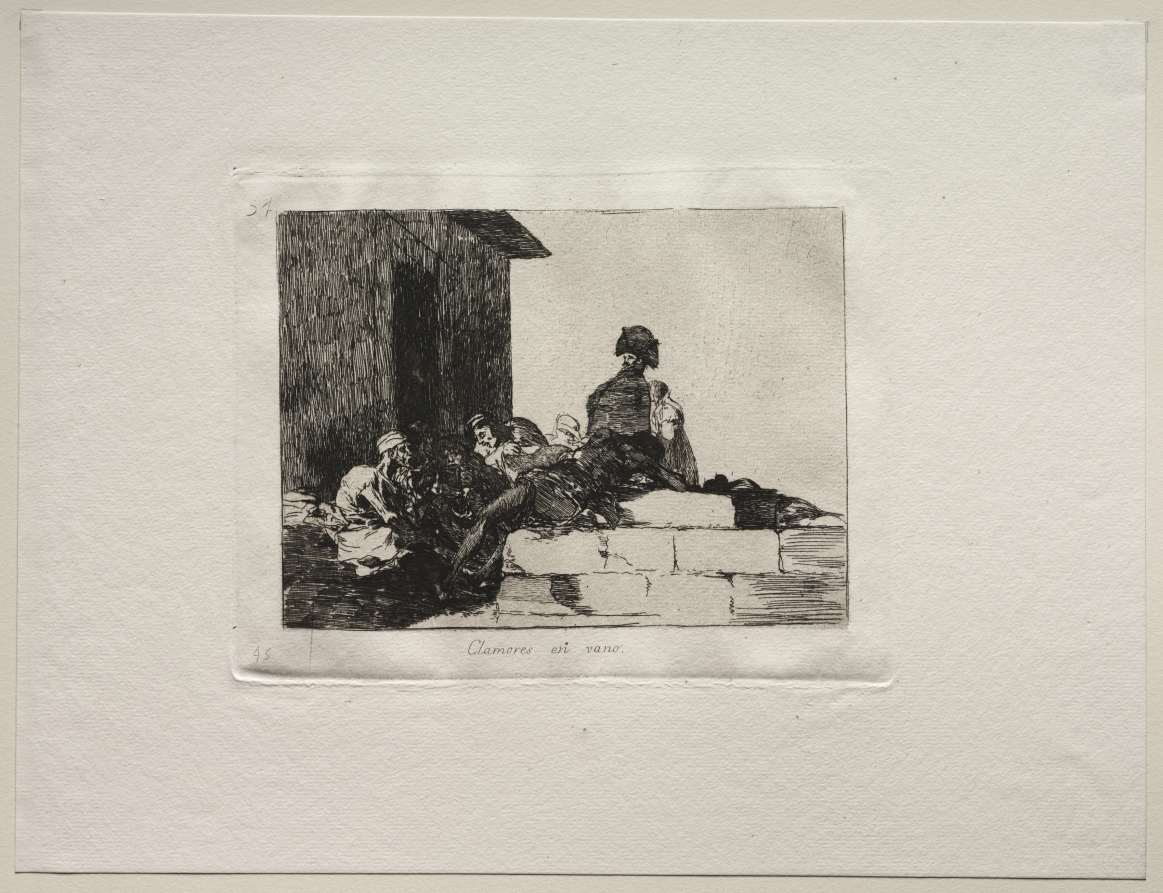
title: The Horrors of War: Appeals are in Vain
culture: Spain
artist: Francisco de Goya (Spanish, 1746–1828)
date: c. 1810–20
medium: etching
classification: Print